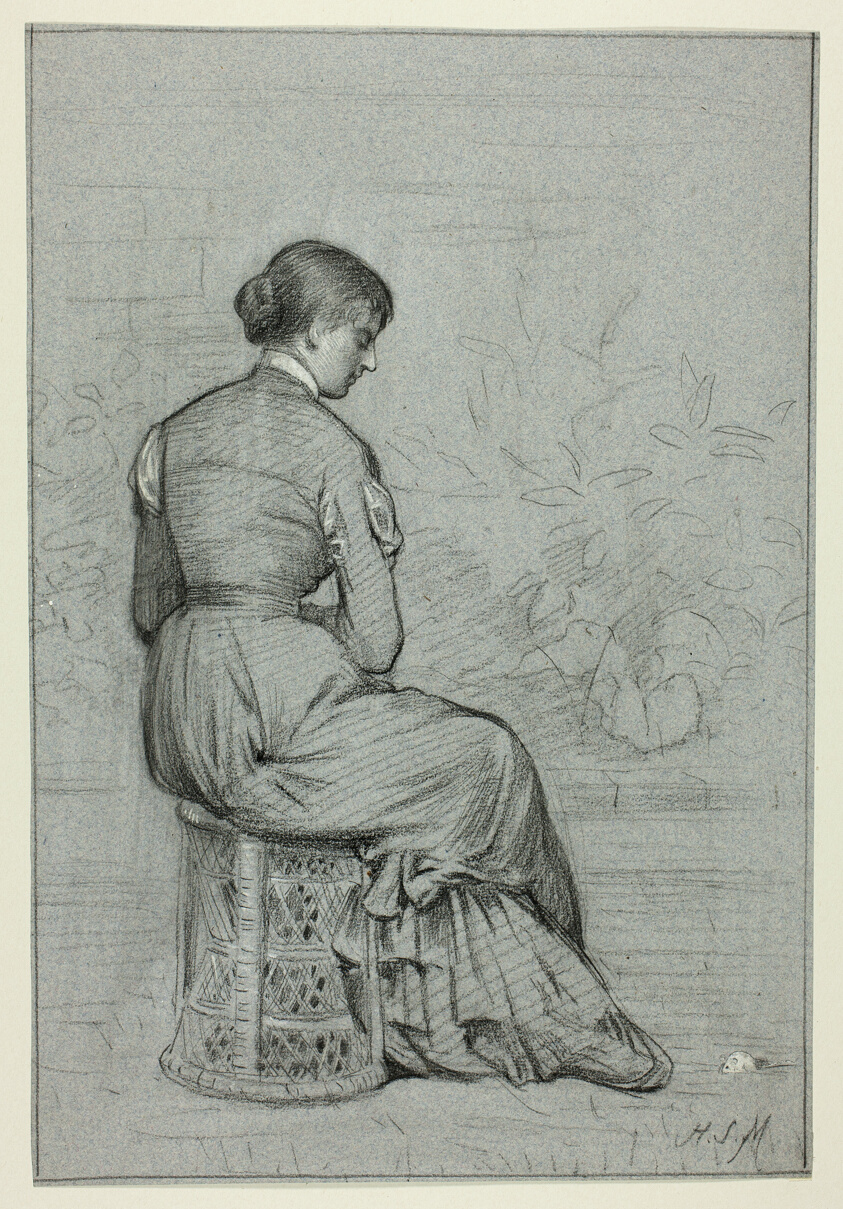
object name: Drawing and Watercolor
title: Woman Seated on a Tabouret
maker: Henry Stacy Marks (English, 1829-1898)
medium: Black pastel, heightened with white gouache, on blue laid paper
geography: England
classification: pastel; drawings (visual works); prints and drawing